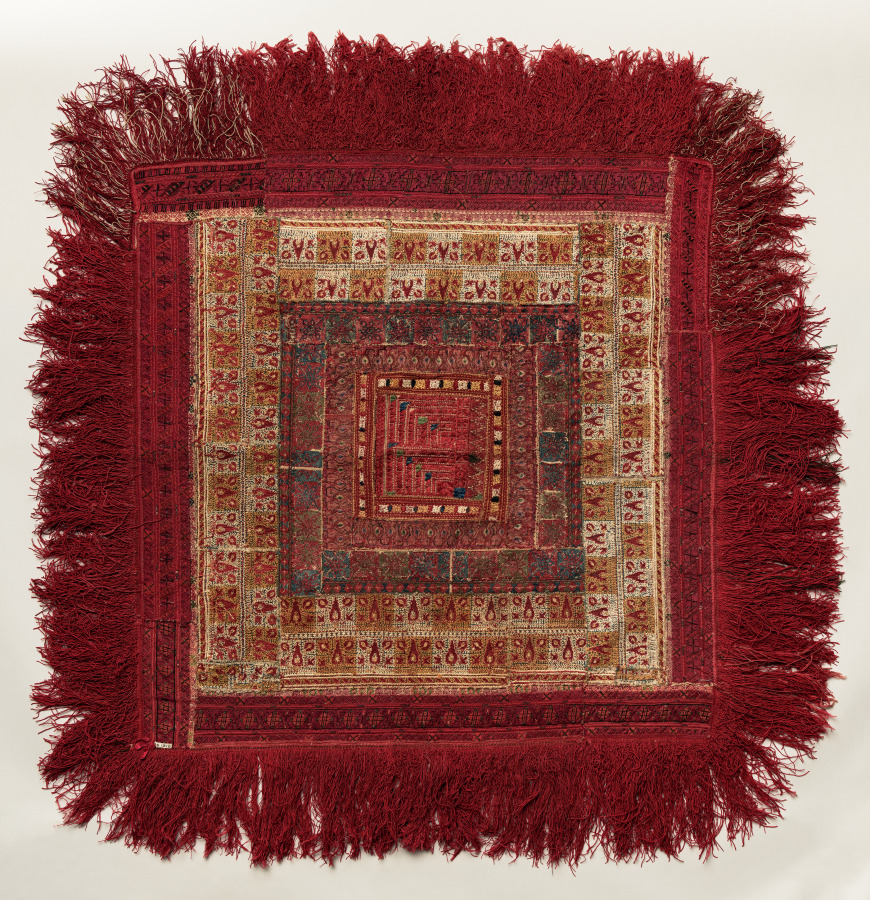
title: Composite textile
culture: Probably Greece or Macedonia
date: 1800s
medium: Silk, dye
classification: Embroidery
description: This large square textile is a composite, assembled from several different woven and embroidered panels and finished with a long thick fringe. These silk-embroidered pieces might have been parts of old clothing or other textiles. Stylistic assessment connects it to Greek and Macedonian traditions; such objects were made in the eastern Mediterranean for the tourist market.